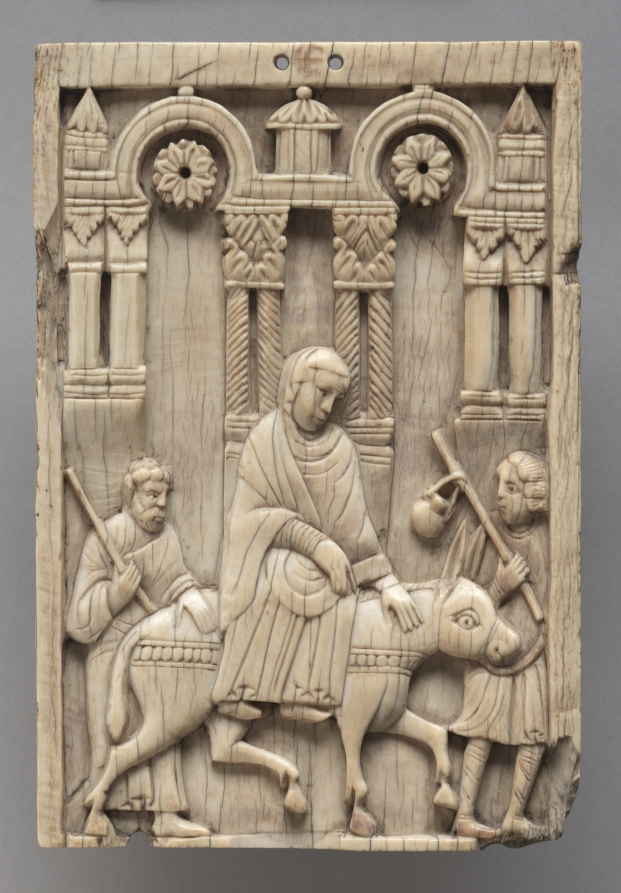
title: Plaque: The Journey to Bethlehem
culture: South Italy, Amalfi, Romanesque period, 12th century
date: c. 1100–1120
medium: ivory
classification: Ivory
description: This ivory plaque depicts Mary, Joseph, and one of his sons from a previous wife on their way to Bethlehem. The scene is set within an architectural frame that combines Byzantine decorative elements (such as the acanthus leaf column capitals) with Islamic architectural motifs (most notably, the distinctively rounded arches). The blending of Byzantine, Islamic, and Western iconographic elements and decorative motifs is typical for the art produced in the city of Amalfi, a prosperous merchant town near Naples in South Italy.